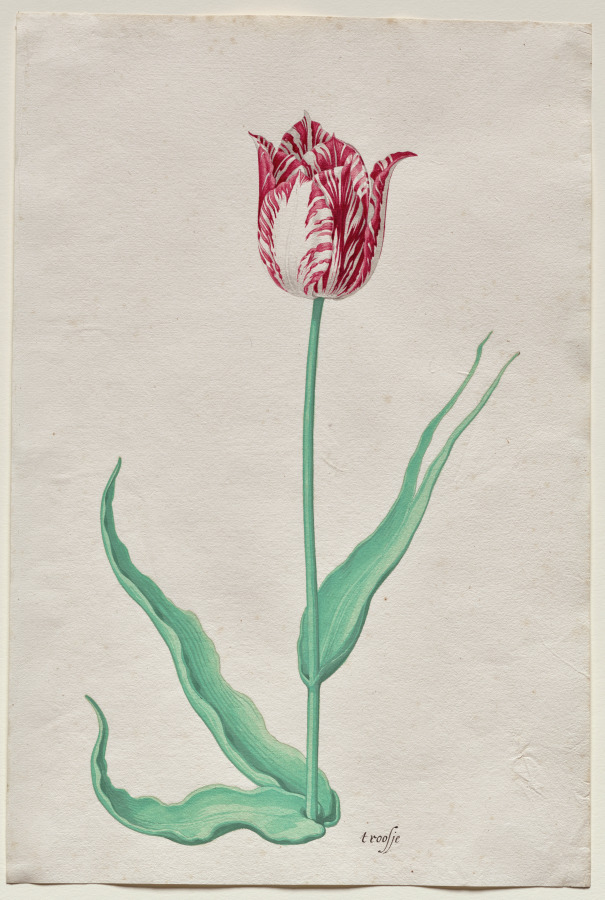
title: Study of a Tulip ('t roosje)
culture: Netherlands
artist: Pieter Holsteyn II (Dutch, c.1612–1673)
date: c. 1645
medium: Point of brush and transparent and opaque watercolors with traces of graphite and gum glazing on antique laid paper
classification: Drawing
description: This image of a tulip was made as part of a tulip book used as a grower’s marketing tool during the so-called tulip mania, a speculative bubble in 17th-century Holland, when ten tulip bulbs could cost more than a stately Amsterdam canal house. The striations on the tulip, which were caused by a virus in the bulb, made it especially valuable. Pieter Holsteyn II was one of many artists in the Netherlands at the time who specialized in botanical illustration. This tulip's Dutch name, inscribed on the sheet, means "trumpet."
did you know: In 17th-century Holland, some tulip bulbs were as expensive as a stately Amsterdam canal house.